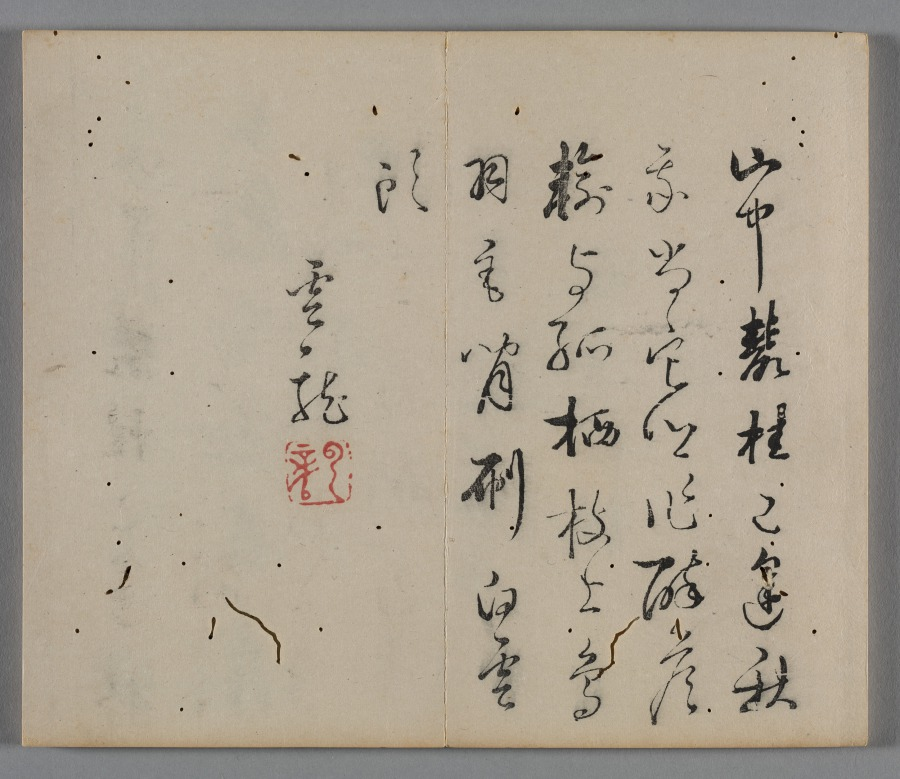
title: Ten Bamboo Studio Painting and Calligraphy Handbook (Shizhuzhai shuhua pu): Birds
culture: China, Qing dynasty (1644-1911)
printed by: Hu Zhengyan (Chinese, c. 1584–1674)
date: 1633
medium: Woodblock-printed book; ink and colors on paper; first edition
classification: Print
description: Color printing reached a level of perfection in the early 1600s, as seen in this Ten Bamboo Studio Collection of Calligraphy and Painting and the Mustard Seed Garden Manual of Painting (printed 1679 and 1701). The painterly quality, precision in registering (aligning) the woodblocks, and harmonious colors made them the most successful color print editions in Chinese history. Both editions were printed and compiled in Nanjing, spread nationwide, and had a great impact on the arts in Japan and Korea.